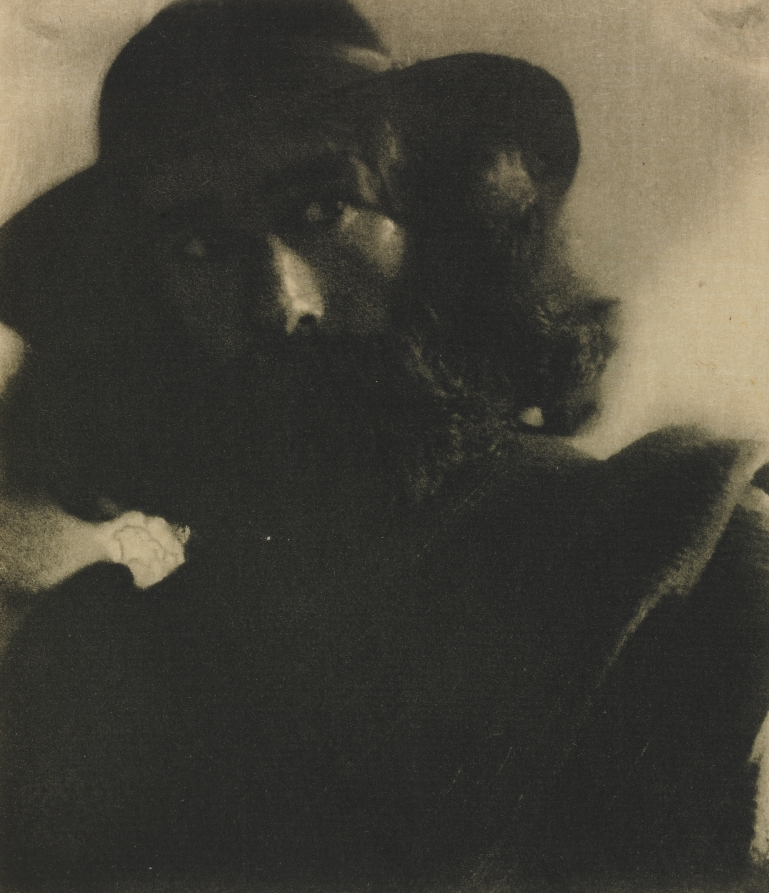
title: Camera Work: A Model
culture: France, 20th century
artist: Robert Demachy (French, 1859–1936)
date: 1906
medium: photogravure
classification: Bound Volume